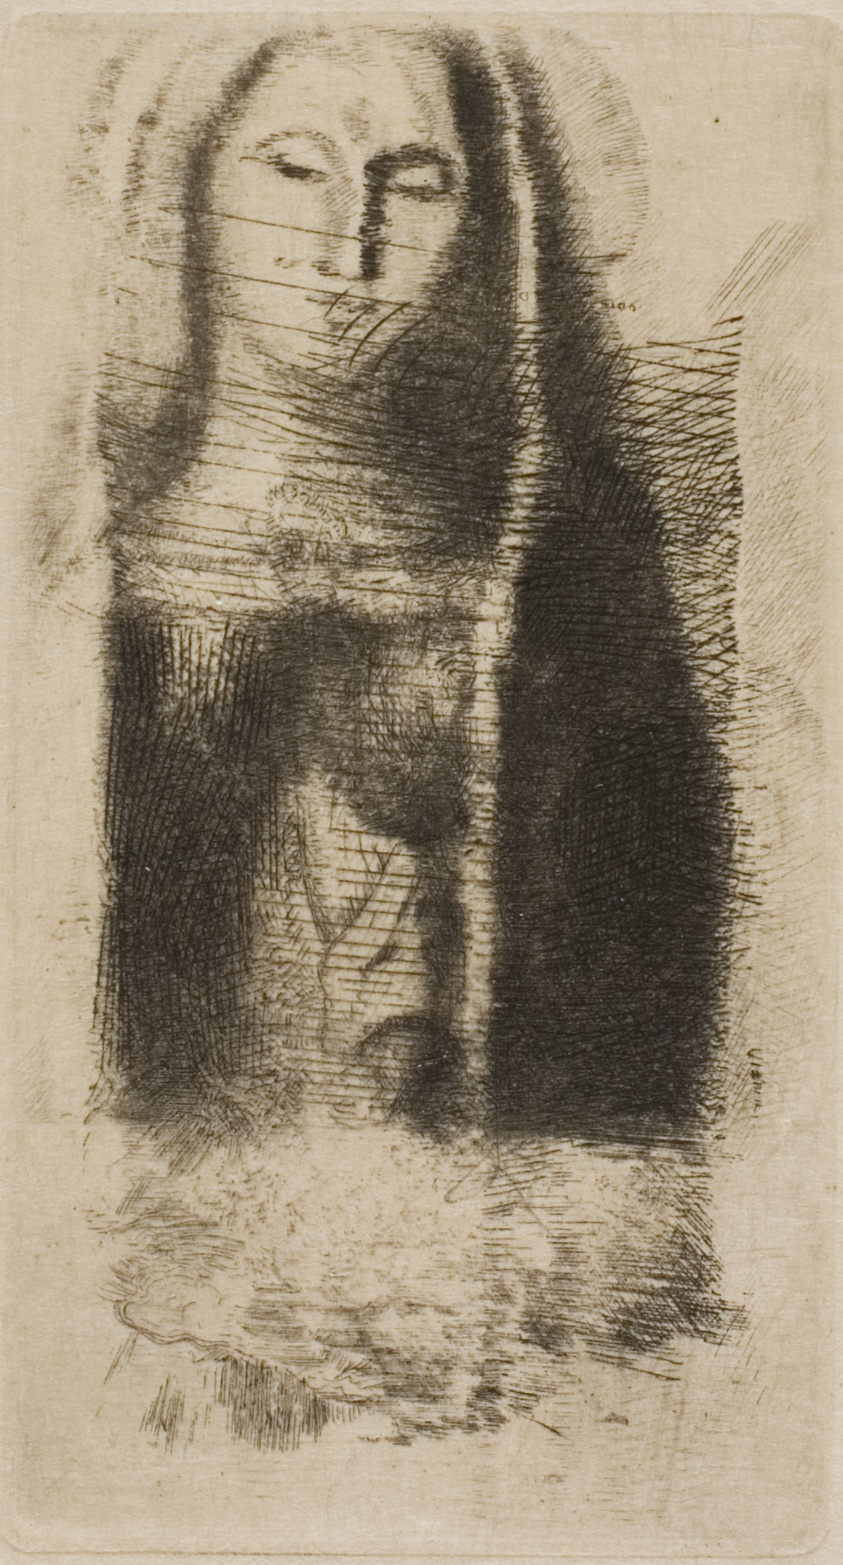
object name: Print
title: Princess Maleine (The Little Madonna)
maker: Odilon Redon (French, 1840-1916)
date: 1892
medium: Etching and drypoint on ivory Japanese paper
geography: France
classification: etching; print; prints and drawing; paper